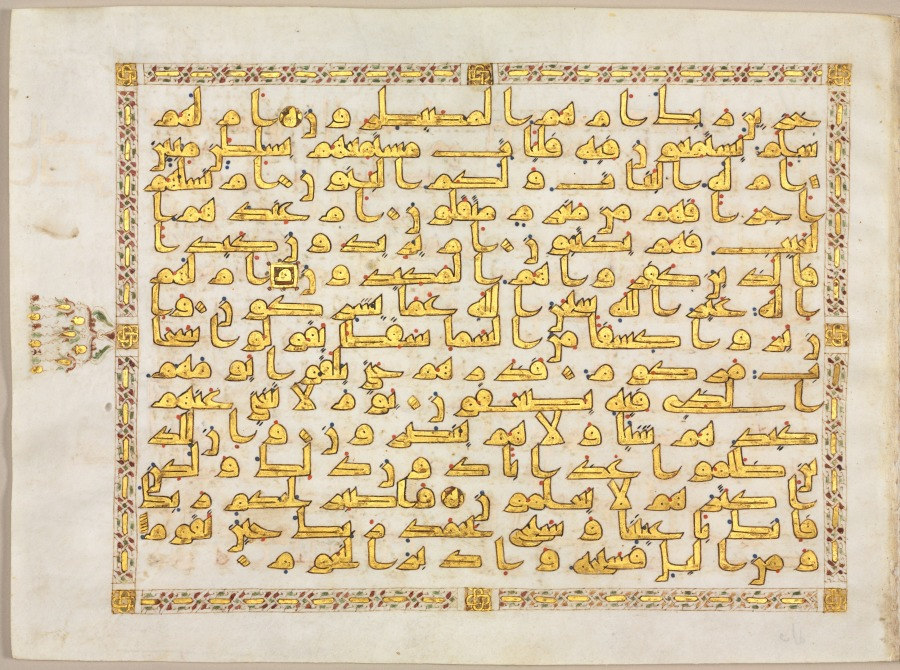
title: Qur'an Manuscript Folio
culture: North Africa, Aghlabid or Abbasid, 9th century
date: 800s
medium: gold, ink and colors on parchment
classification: Manuscript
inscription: Kufic calligraphy. Text on the right page is the opening of the Chapter of the Star (53:1–21) and text on the left page is from the Chapter of the Moon (54:13–27).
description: Calligraphy, the art of beautiful writing, was elevated above all other art forms in the Islamic world because Allah, God, revealed the divine word of Islam to the Prophet Muhammad in the Arabic language. Arabic script evolved gradually until the 800s when Muslim scribes produced copies of the Qur'an that were calligraphic masterpieces. This Qur'an, written entirely in gold, exemplifies the angular form of writing known as kufic at its majestic best. Distinctive markings—short ink strokes, colored dots—identify the vocalization of the text. Each folio is framed by an interlacing border and displays a leafy motif in the outer margin. The text on the right page is the opening of the Chapter of the Star (53:1–21) with a section heading in the margin and an illuminated foliate band for the chapter heading at the top of the page. It begins: “By the star when it plunges, your comrade is not astray, neither errs, nor speaks he out of caprice. This is naught but a revelation revealed, taught him by one terrible in power, very strong.” The text on the left page is from the Chapter of the Moon (54:13–27).